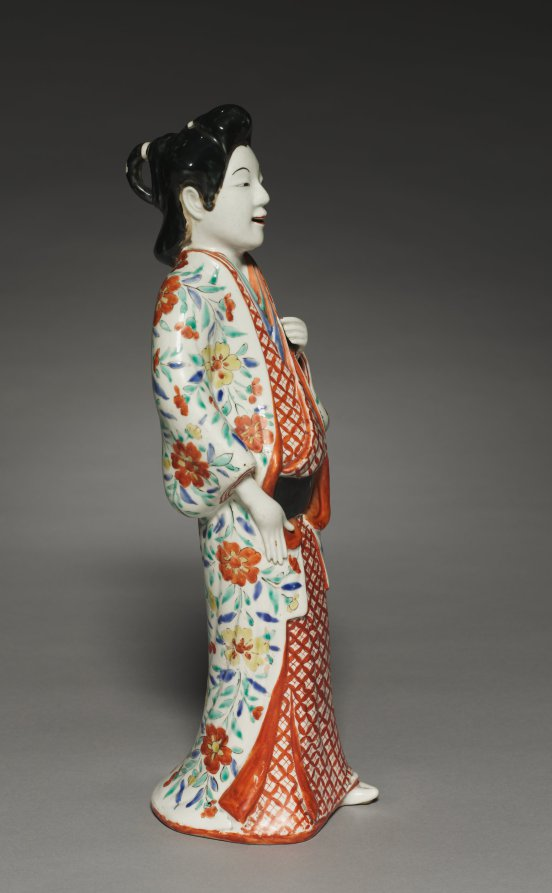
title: Standing Figure of a Beauty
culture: Japan, Edo period (1615–1868)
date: c. 1690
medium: Porcelain with overglaze color enamels (Hizen ware, Kakiemon type)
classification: Ceramic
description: Dressed in layered robes and a jacketlike garment called an uchikake with a lively floral design, figures such as this one may have derived from dolls formed in the likeness of courtesans. It was produced in Hizen Province (in present-day Saga Prefecture on the island of Kyushu) by the Sakaida family of ceramists, the head of which has gone by the first name Kakiemon for many generations. As a result, the studio’s historical works are known as Kakiemon ware. The studio is distinguished for being among the earliest in Japan to use multicolor overglaze enamel and for the milky white of its porcelain.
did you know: Look closely! One of this fashionable woman's feet is peeking out from under her layered kimono.